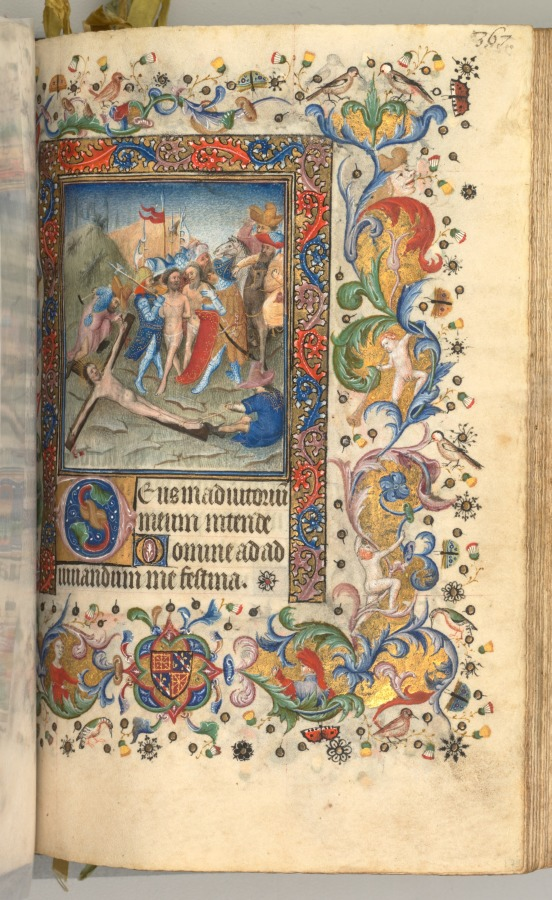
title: Hours of Charles the Noble, King of Navarre (1361-1425): fol. 179r, Christ Nailed to the Cross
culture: France, Paris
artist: Master of the Brussels Initials and Associates (French)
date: c. 1405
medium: ink, tempera, and gold on vellum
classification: Bound Volume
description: This precious volume was obviously highly prized by its owner, the French-born King of Navarre, who had his coat of arms painted on no less than twenty folios. Rather than directly commissioning this manuscript from a specific workshop, it seems that Charles the Noble acquired his book of hours -- perhaps ready-made for the luxury market -- while on a trip to Paris in 1404-05. A collaborative effort, six painting styles are evidenced within the pages of this codex, those of two Italians, two Frenchmen, and two Netherlanders. The painter who was responsible for the planning and decoration of the book, and who produced seventeen of the large miniatures, was a Bolognese artist known as the Master of the Brussels Initials. His principal assistant, responsible for most of the borders, was a Florentine who signed his name "Zecho" da Firenze on folio 208 verso.